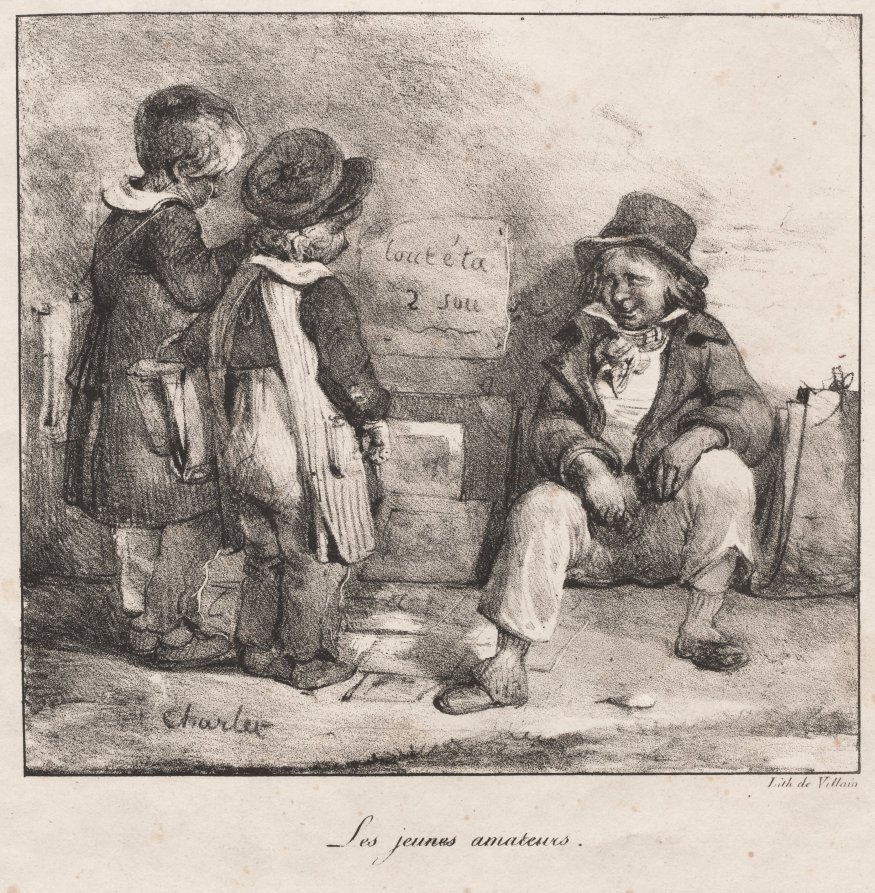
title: Sketch Book for the Use of Small Children: The Young Amateurs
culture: France, 19th century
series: Charlet's first lithographic album: Recueil de Croquis a L'usage des petits Enfans, Paris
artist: Nicolas Toussaint Charlet (French, 1792–1845)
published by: Gihaut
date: 1822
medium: lithograph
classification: Print